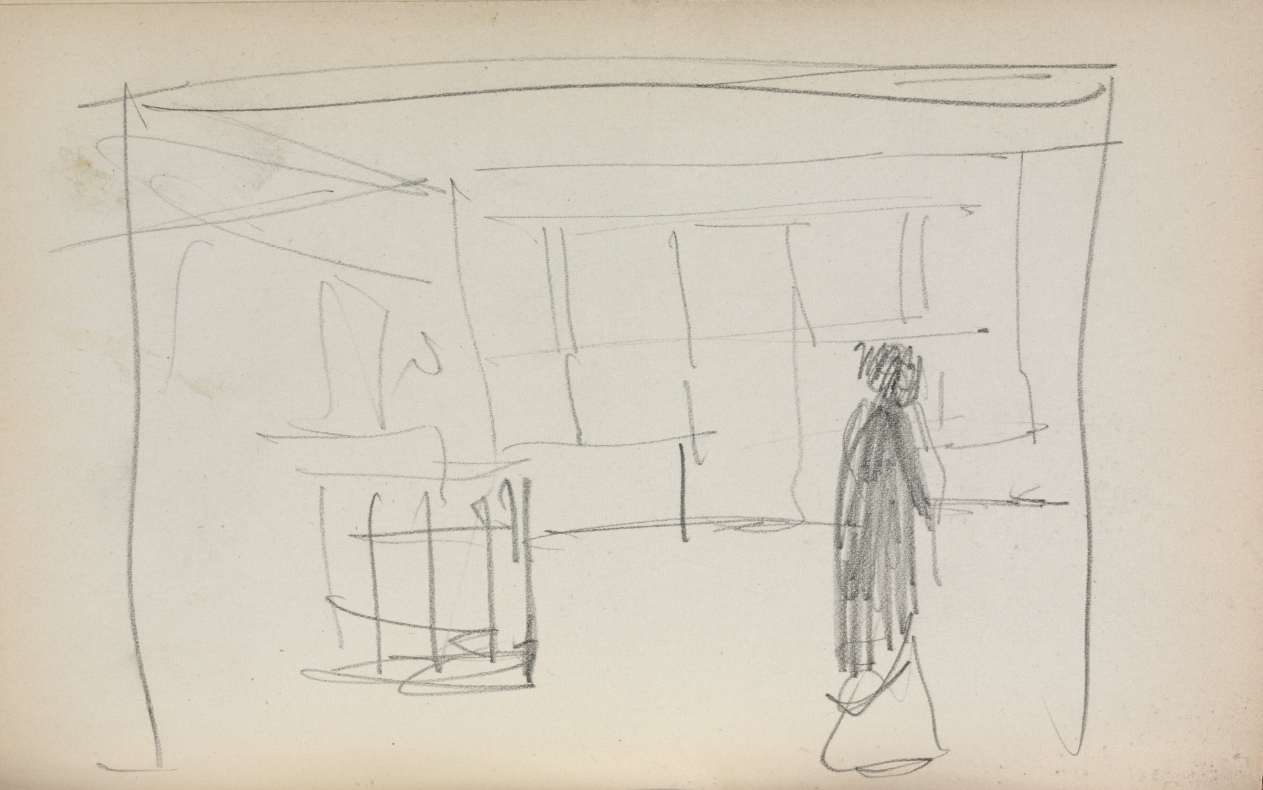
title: Italian Sketchbook: Figure in an interior (page 175)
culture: America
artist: Maurice Prendergast (American, born Newfoundland [now Canada], 1858–1924)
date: 1898–1899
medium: pencil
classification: Bound Volume